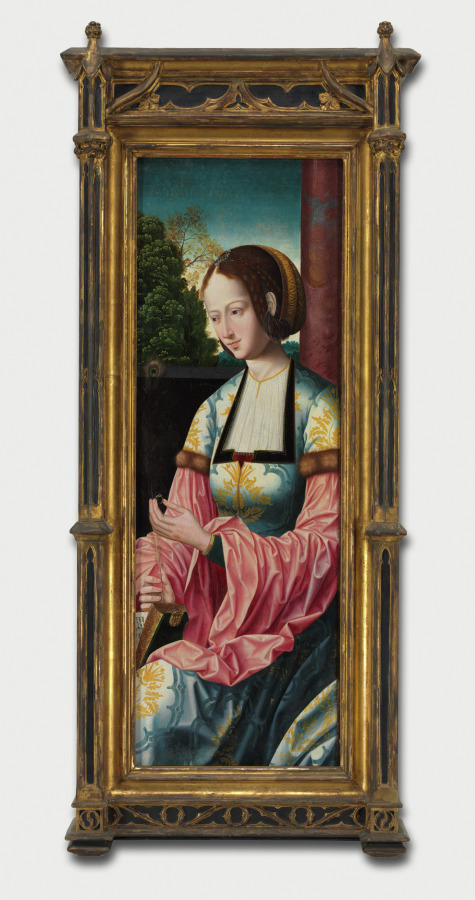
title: Saint Barbara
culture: Flanders, Bruges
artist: Master of the Holy Blood (Netherlandish)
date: c. 1520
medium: tempera on wood panel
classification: Painting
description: Saint Barbara holds both a book and a ring symbolizing her scholarly pursuits and union with God. According to legend, the leather thongs with which she was beaten were transformed into peacock plumes. This painting and one other in the collection (1942.633.1) were originally the wings of an altarpiece flanking a central panel, now lost, that may have depicted the Holy Family. The identity of this artist is unknown, but he is named for a painting in the Chapel of the Holy Blood in Bruges. Bruges flourished as an international commercial center through the 1400s and early 1500s. Among its residents were many foreign merchants and bankers who, along with the Burgundian court, patronized artists and attracted specialized craftsmen such as furriers, hatters, jewelers, and goldsmiths. Bruges’s artistic production in the 1400s included celebrated artists like Jan van Eyck, Petrus Christus, Hans Memling, and Gerard David who painted large altarpieces, small panels for private devotion, and portraits. Bruges also remained an important center for the production of illuminated manuscripts.